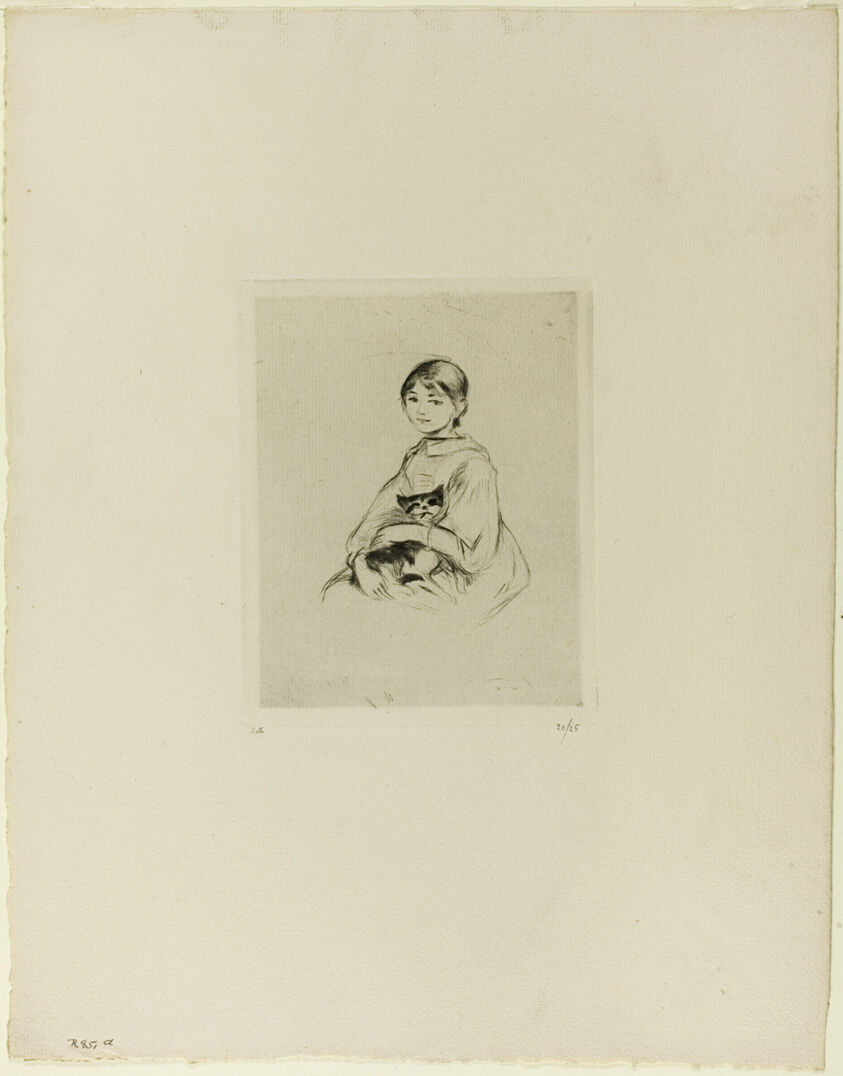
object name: Print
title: Young Girl with a Cat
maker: Berthe Morisot (French, 1841-1895)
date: 1889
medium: Drypoint in black on cream laid paper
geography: France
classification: drypoint; print; prints and drawing